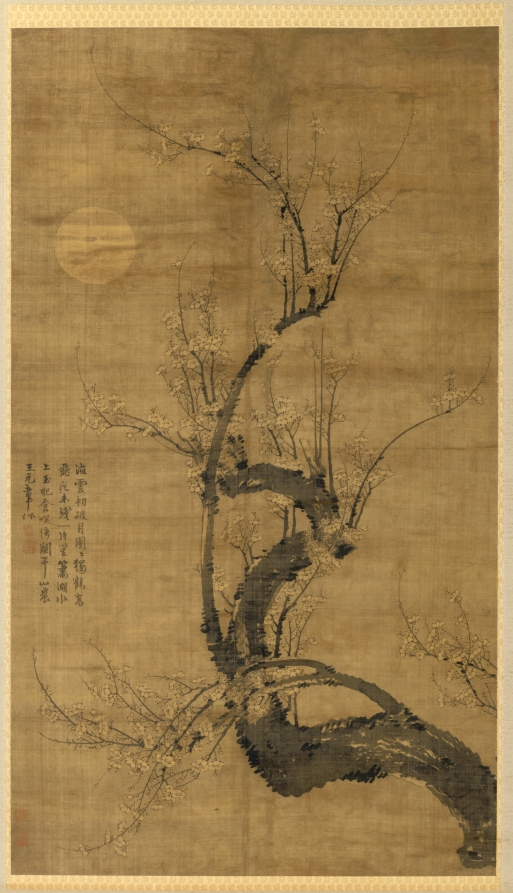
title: A Prunus in the Moonlight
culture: China, Yuan dynasty (1271-1368)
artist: Wang Mian (Chinese, 1287–1359)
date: 1300s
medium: Hanging scroll; ink on silk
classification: Painting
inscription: 8 additional seals: 6 of the Qianlong 乾隆 emperor (r. 1736-95); 2 of Dong Gao 董誥 (1740-1818).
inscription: 海雲初破月團團，獨鶴高飛夜未殘。/ 一片笙簫湖水上，玉妃含笑倚闌干。 王元章作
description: The plum flourishes in the mild climate of the south, and it was not before the Six Dynasties period (220– 589 CE) that the motif began to be appreciated by southern artists, many of whom had emigrated from the north. Wang Mian from Zhejiang province had failed the civil and military service examinations and later rejected appointments under the Mongol government. Instead, he chose to return home, making a living by selling plum paintings. Few of Wang’s works have survived, but they demonstrate that by his time the ink-plum (momei) genre was fully developed.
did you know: The painting portrays the plum in the nighttime, as indicated by the tint of the background and the presence of the moon.